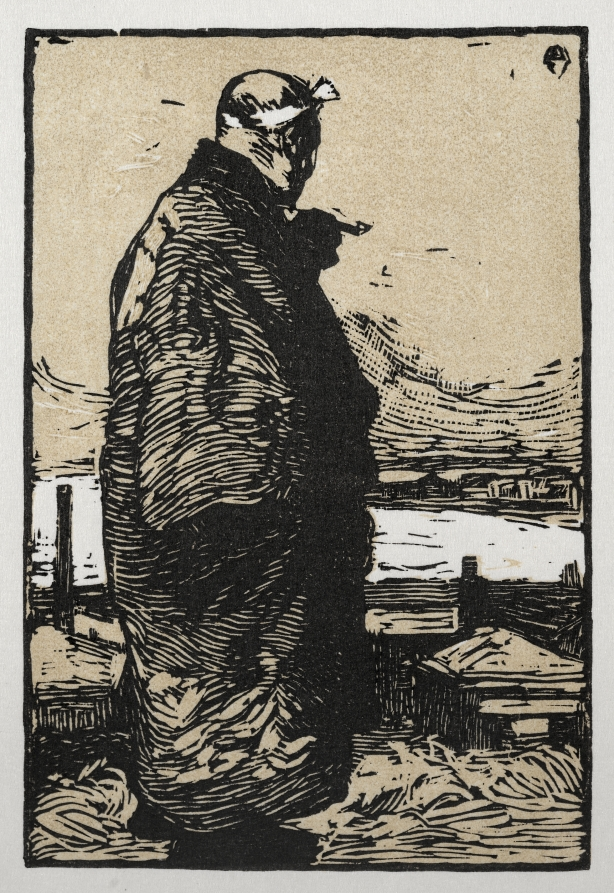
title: Fisherman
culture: Japan, Meiji period (1868–1912)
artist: Yamamoto Kanae (Japanese, 1882–1946)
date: 1906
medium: woodcut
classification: Print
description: This modest print marks the beginning of the sosaku-hanga movement which encouraged artists to carve and print woodblocks themselves. Fisherman, featured in the art and literary magazine Myojo (Morning Star) in 1904, accompanied an article describing Yamamoto’s revolutionary defiance of the traditional separation between the originator of the design and the artisans who execute the print, elevating woodcuts to the level of fine art. The print is also unmistakably modern in the simple, poignant depiction of the old man of the sea and in the artist’s deliberate retention of traces left by the gouge that cut the block. From the mid-19th century, when European and American artists first discovered ukiyo-e prints, Japanese pictorial conventions had a major influence on Western art. In the same way, when American naval officer Matthew Perry arrived in Japan in 1853, ending the island’s 200 years of seclusion, Japanese artists began to emulate aspects of European art. Yamamoto was impacted by British printmaker William Nicholson, who in turn had derived his bold style of a flat figure against an unmodulated background from Japanese woodcuts.